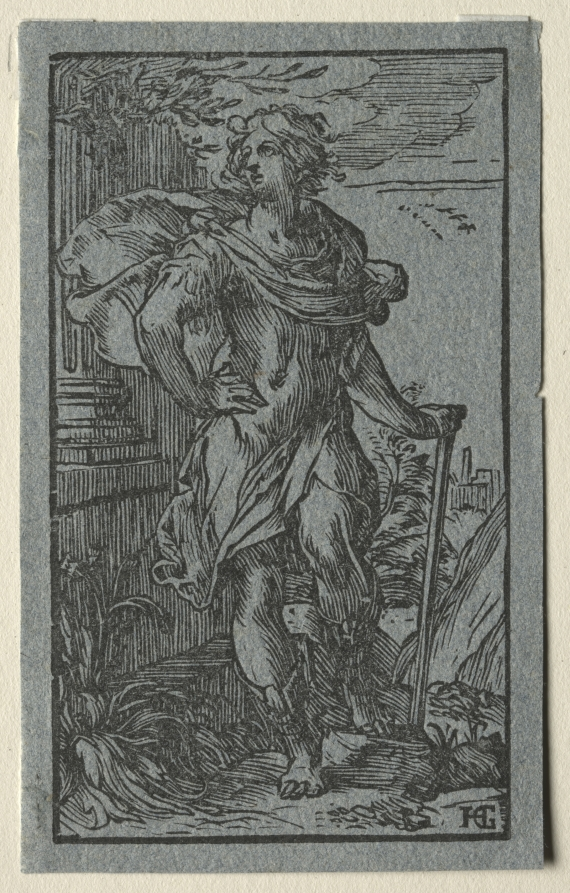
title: Young Man Standing with a Cane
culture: Netherlands, 16th century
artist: Hendrick Goltzius (Dutch, 1558–1617)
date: c. 1598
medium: woodcut on blue paper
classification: Print